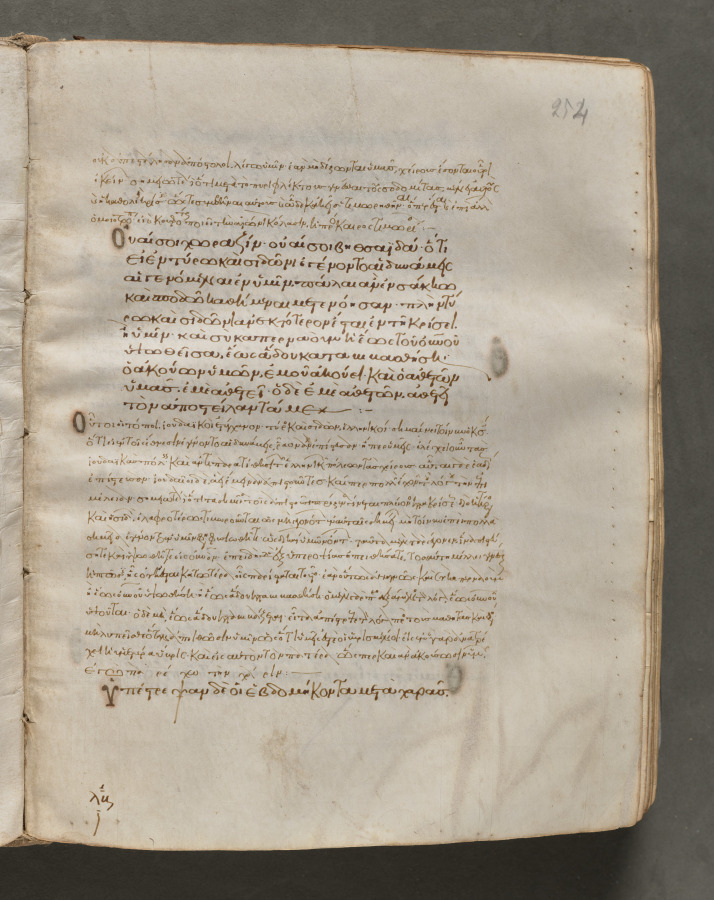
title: Text, folio 254 (recto), from a Gospel Book with Commentaries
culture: Byzantium, Constantinople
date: c. 1000–1100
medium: ink, tempera, and gold on vellum; leather binding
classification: Bound Volume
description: Each of the four gospels in this book opens on a page with brilliantly illuminated borders depicting the author of the text as well as birds—principally peacocks, symbols of the immortality of the soul—and fountains, representing the fountain of life and the salvation of the soul. This volume consists of 428 leaves with texts in Greek. Its level of sophistication suggests that it was probably written and decorated in a monastery in Constantinople.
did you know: Gospel books were carried in procession through Byzantine churches.